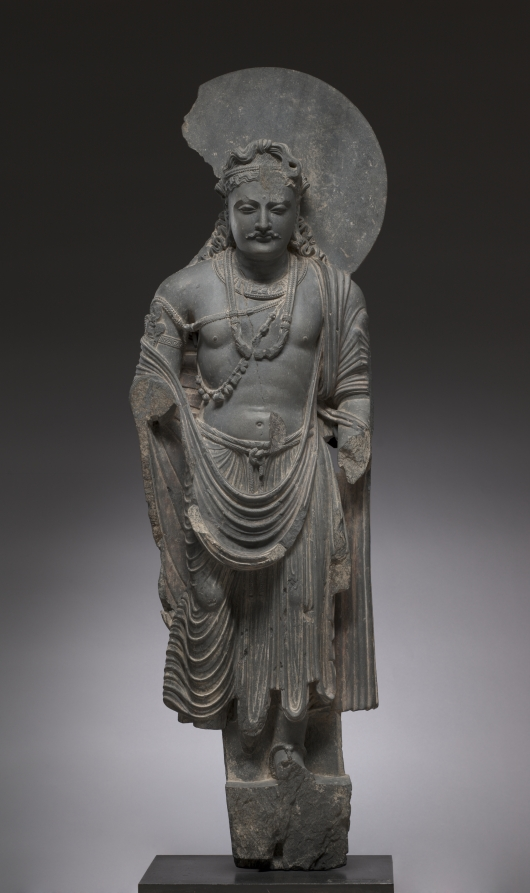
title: Bodhisattva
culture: Pakistan, Gandhara, Kushan period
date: late 100s CE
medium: schist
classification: Sculpture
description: Bodhisattvas, who are one stage away from complete enlightenment, are depicted as royal figures because the Buddha himself was a prince before he renounced that life and finally achieved enlightenment. He wears elaborate jewelry, including a string of amulets diagonally across his chest. The garments are Indian, but the muscular torso is derived from Greco-Roman sources.